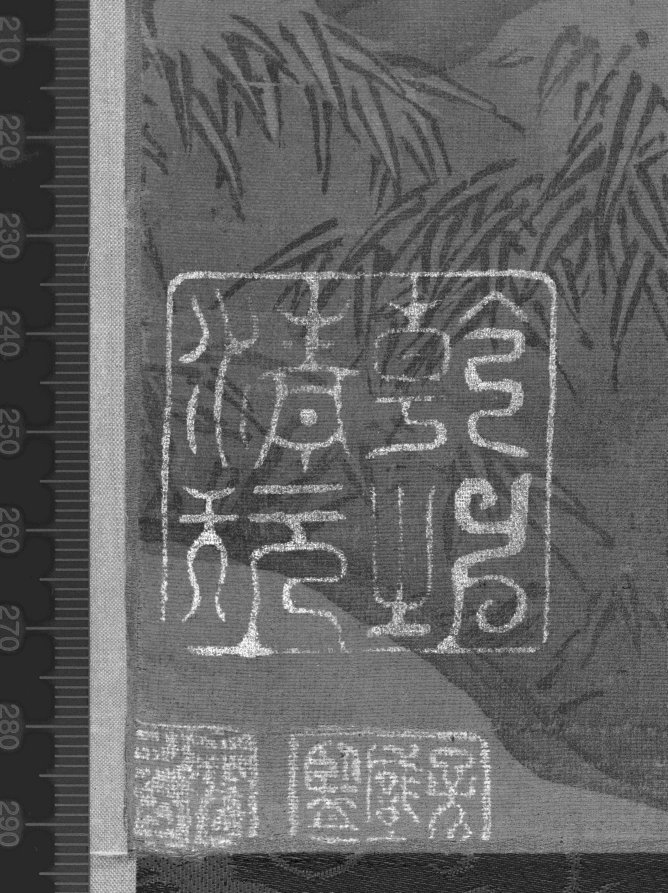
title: Birds in a Grove in a Mountainous Winter Landscape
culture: China, Jin dynasty (1115-1234)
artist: possibly by Gao Tao (Chinese, 1100s)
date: 1100s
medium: hanging scroll; ink and slight color on silk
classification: Painting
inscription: A signature and a seal at lower left edge: Gao Tao 高燾; seal undecipherable. 10 additional seals: 1 of Zhu Gang 朱棡 [1358–1398]; 3 of Suo’etu 索額圖 [1636–1703]; 2 of A’erxipu 阿爾喜普 [1700s]; 1 of Weng Fanggang 翁方綱 [1733–1818]; 3 unidentified.